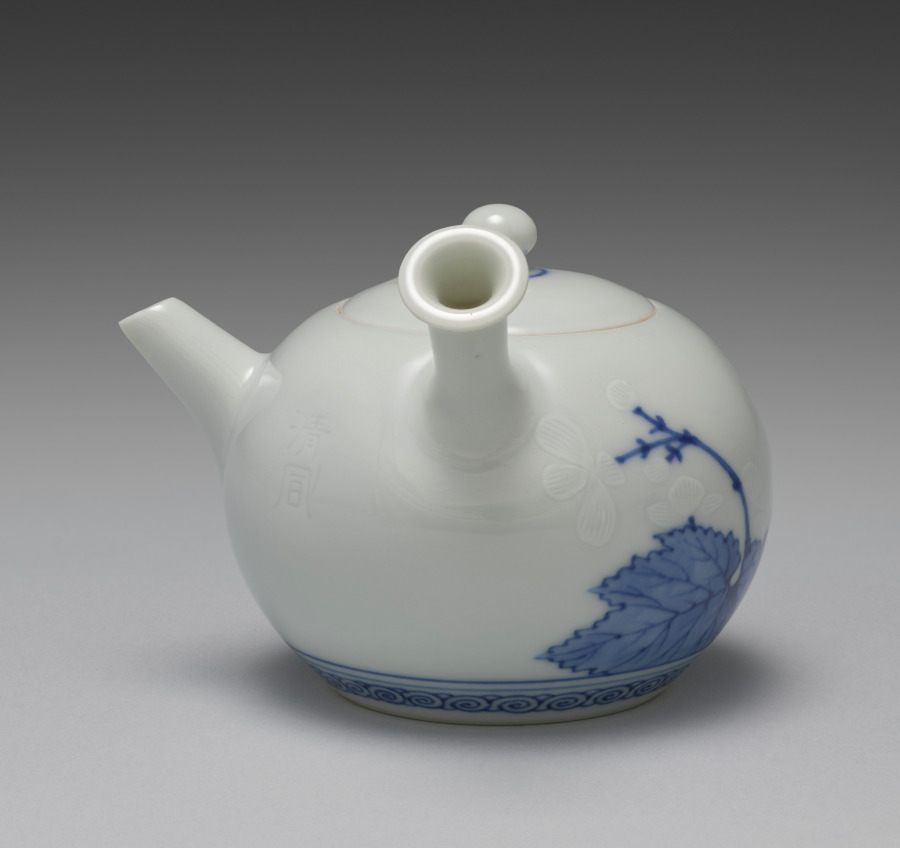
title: Teapot with Begonias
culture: Japan, Meiji period (1868–1912)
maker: Seifū Yohei III (Japanese, 1851–1914)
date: 1897–1914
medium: Porcelain with underglaze and overglaze colors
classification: Ceramic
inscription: 清風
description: This teapot has complex surface treatment: a design of begonias in modulated underglaze blue for the leaves and stems as well as thick overglaze white with incised lines to define the petals, plus small areas of underglaze yellow at their low-relief centers. A band of underglaze blue gives further definition to the lid’s handle, and the area just above the base has a double band of blue above a row of snail-shell curls. Unlike many other teapots, which have marks on their bases, this one has “Seifu” incised into one of its sides in relatively large characters. It is the side that would face the host if the teapot were held by the handle with the right hand, which would be the expectation.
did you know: This teapot with begonias combines underglaze blue with subtle use of yellow and white enamels.